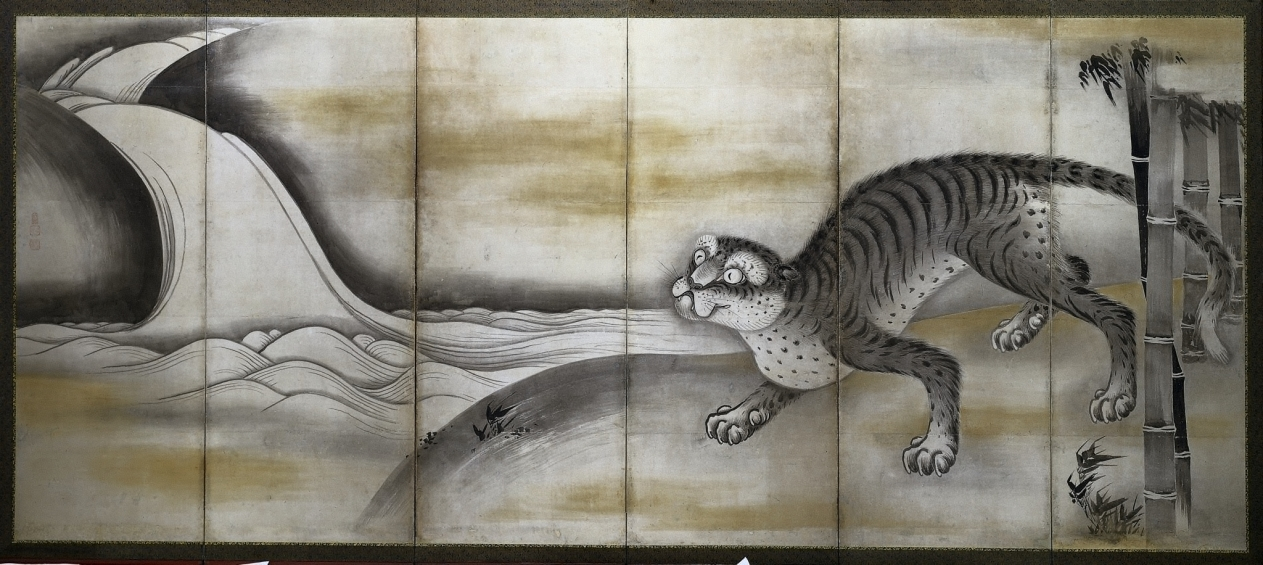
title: Tiger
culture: Japan, Edo period (1615–1868)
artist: attributed to Soga Nichokuan (Japanese)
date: early to mid-1600s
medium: six-panel folding screen; ink, slight color, gold, and silver on paper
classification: Painting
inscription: Signed: Soga Chokuan II (Soga Chokuan ni). Sealed: Hoin (right), Soga Chokuan Hoin (three seals at left) Edo period (1615-1868)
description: A tiger looks upon a waterfall as it prowls out of a bamboo grove on this screen, and a dragon dives through clouds on the right. Tiger and dragon are traditional symbols of the balancing forces in the world, yin (the feminine aspect) and yang (the masculine aspect). This painting has a signature and seals, identifying it as a work by Soga Nichokuan, a painter thought to be from Sakai (near Osaka), and known primarily for his representations of hawk-eagles (kumataka).